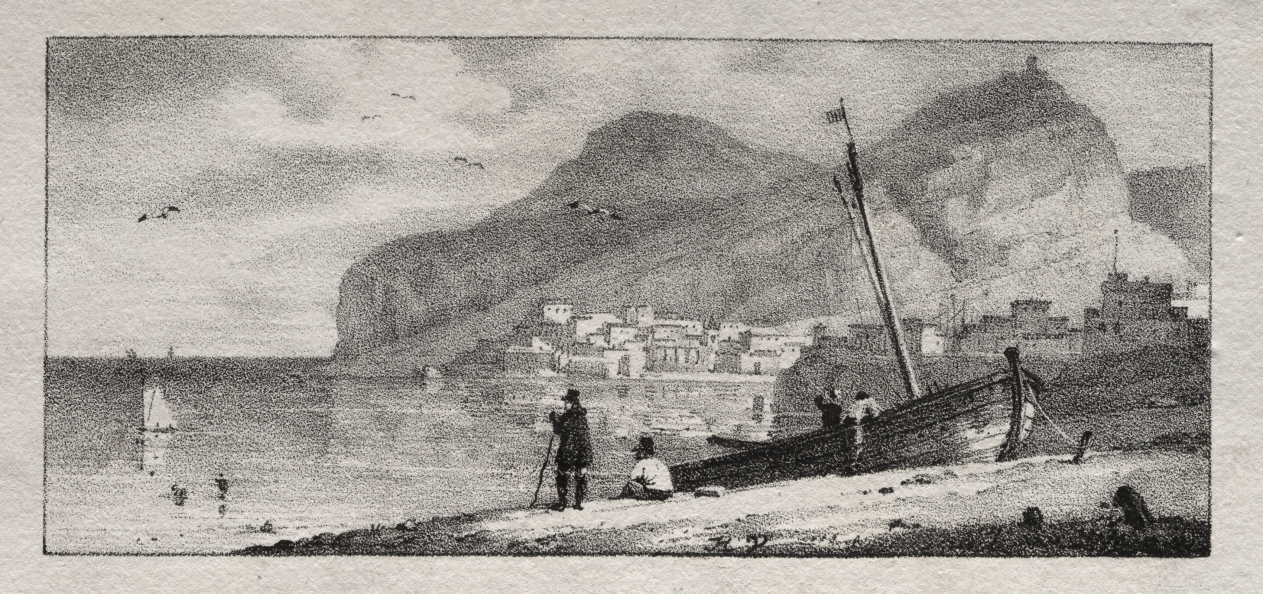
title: View of a Seaport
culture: France, 19th century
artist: Horace Vernet (French, 1789–1863)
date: 1800s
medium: lithograph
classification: Print